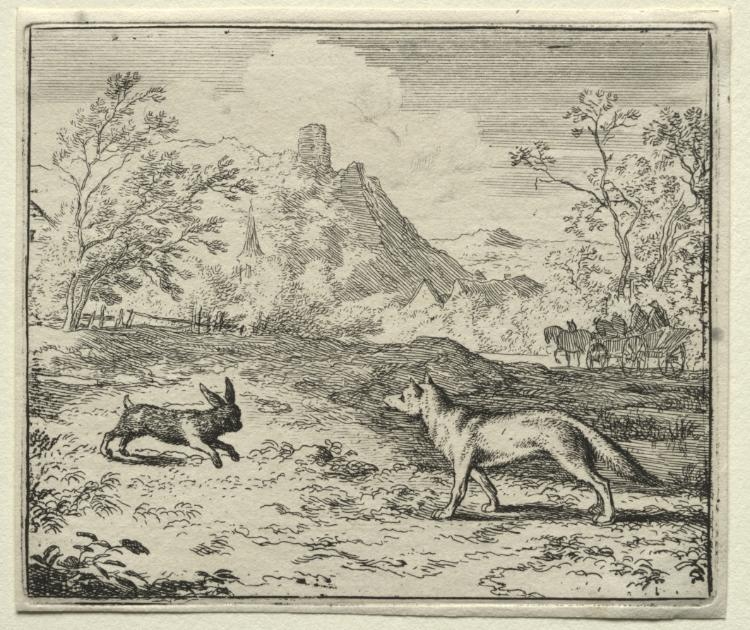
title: Reynard the Fox: Reynard and the Rabbit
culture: Netherlands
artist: Allart van Everdingen (Dutch, 1621–1675)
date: 1650–75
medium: etching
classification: Print